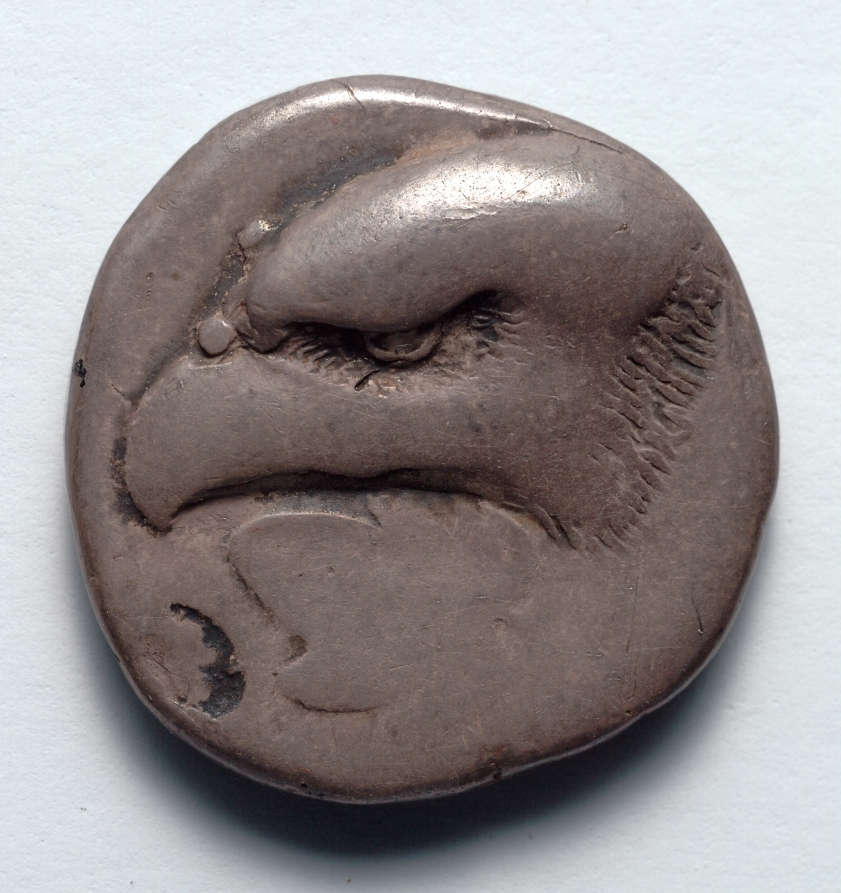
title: Stater: Head of Eagle, Ivy Leaf (obverse)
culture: Greek, probably minted at Elis (Elis)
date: c. 400 BCE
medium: silver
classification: Coins